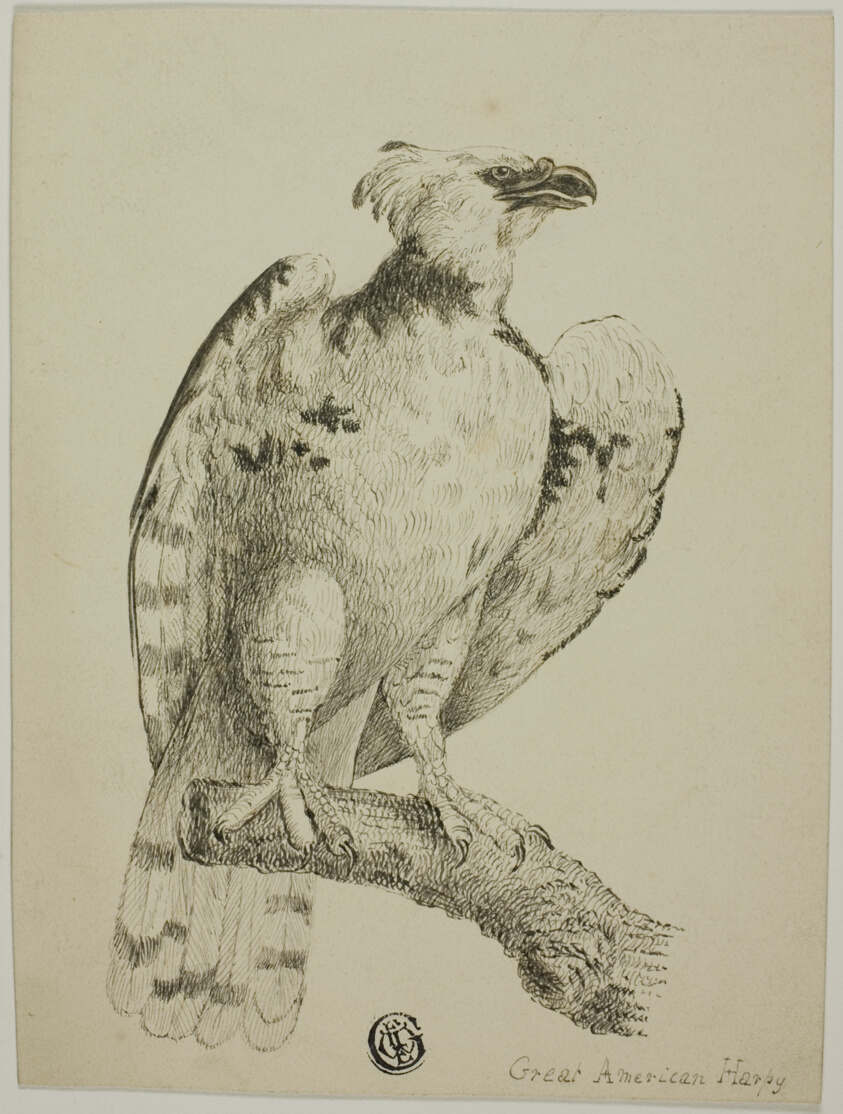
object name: Drawing and Watercolor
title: Great American Harpy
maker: Unknown Artist; American, 19th century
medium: Pen and black ink, on cream wove card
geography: United States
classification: pen and ink drawings; drawings (visual works); prints and drawing